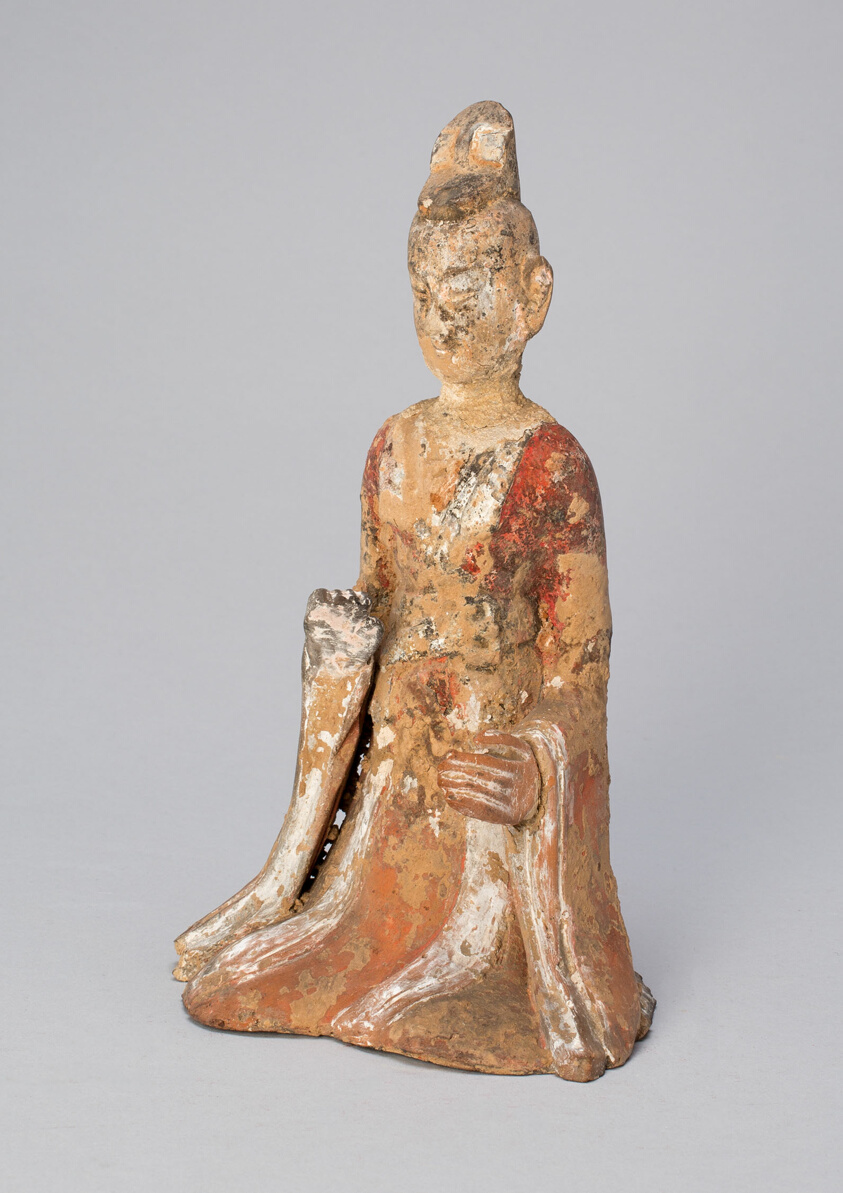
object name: Sculpture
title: Seated Official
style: Chinese (culture or style)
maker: China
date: Northern Wei dynasty (386–535), c. 5th century with later restoration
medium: Earthenware with traces of polychrome pigments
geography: China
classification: ceramics; asian art; sculpture